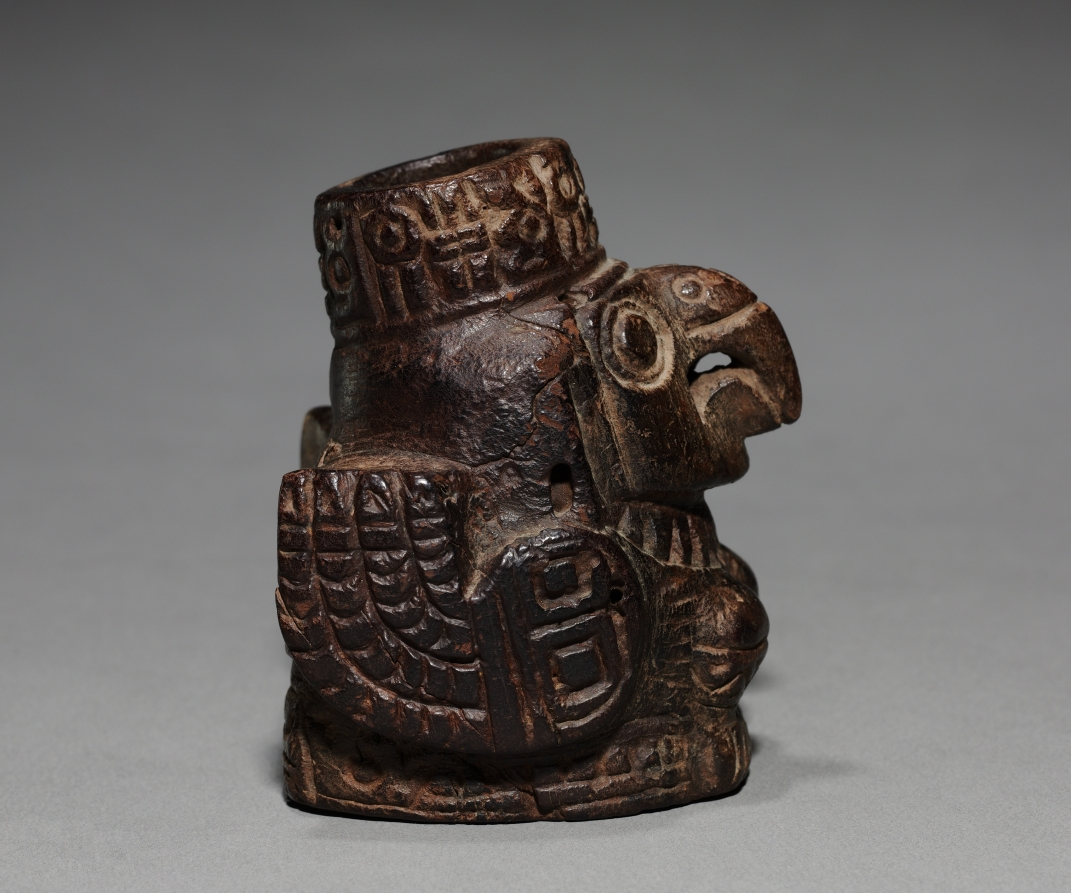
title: Bird-Shaped Container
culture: Peru, Wari style (500-900)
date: 500–900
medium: wood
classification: Sculpture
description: Peruvian Indians today regard coca leaf as a sacred substance that creates communion with deities. The leaves are chewed with powdered lime that in antiquity was stored in containers and scooped with spatulas like those seen here. Aside from its ritual meaning, coca has practical benefits: it is vitamin-rich and, like coffee, induces clear-headedness. The lizard spatula is Nasca; the other two are Wari.